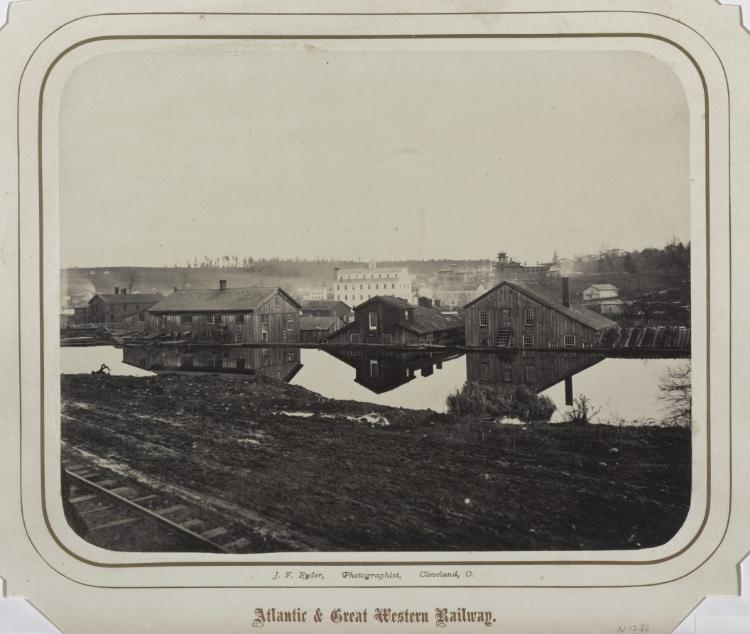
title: Industrial Buildings (Reflected in Erie Canal, Meadville?)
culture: America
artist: James Fitzallen Ryder (American, 1826–1904)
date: 1862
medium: albumen print from wet collodion negative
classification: Photograph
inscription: written in pencil on recto: "N1246" on verso: "26"